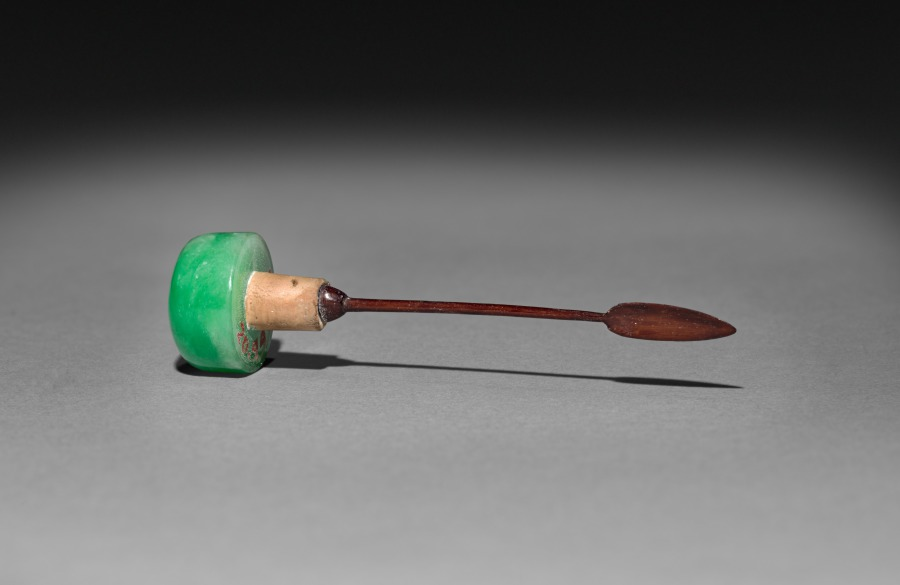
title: Snuff Bottle (stopper)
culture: China, Qing dynasty (1644-1911)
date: 1644–1911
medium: glass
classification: Glass